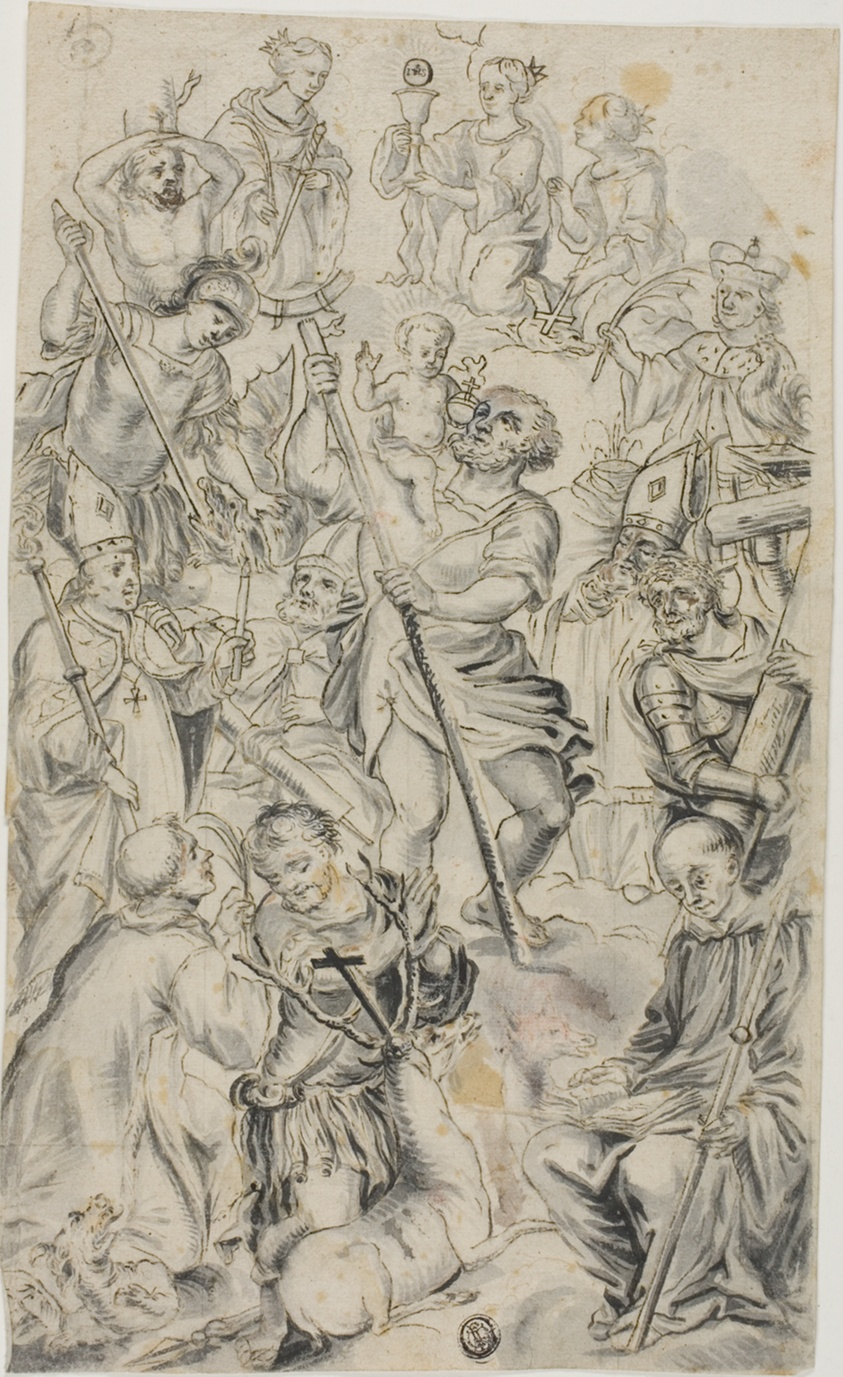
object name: Drawing and Watercolor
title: Fourteen Auxiliary Saints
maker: Unknown Artist; German, 1600-1799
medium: Pen and black ink, and brush and black and gray wash, heightened with lead white (discolored), on ivory laid paper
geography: Germany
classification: ink or chalk wash; drawings (visual works); prints and drawing